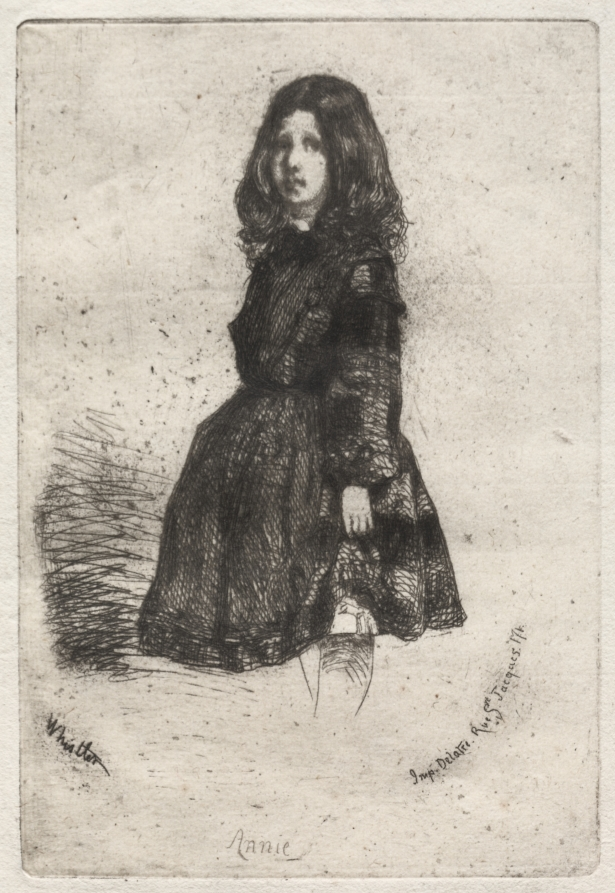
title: Annie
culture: America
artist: James McNeill Whistler (American, 1834–1903)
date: 1857–58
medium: etching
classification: Print